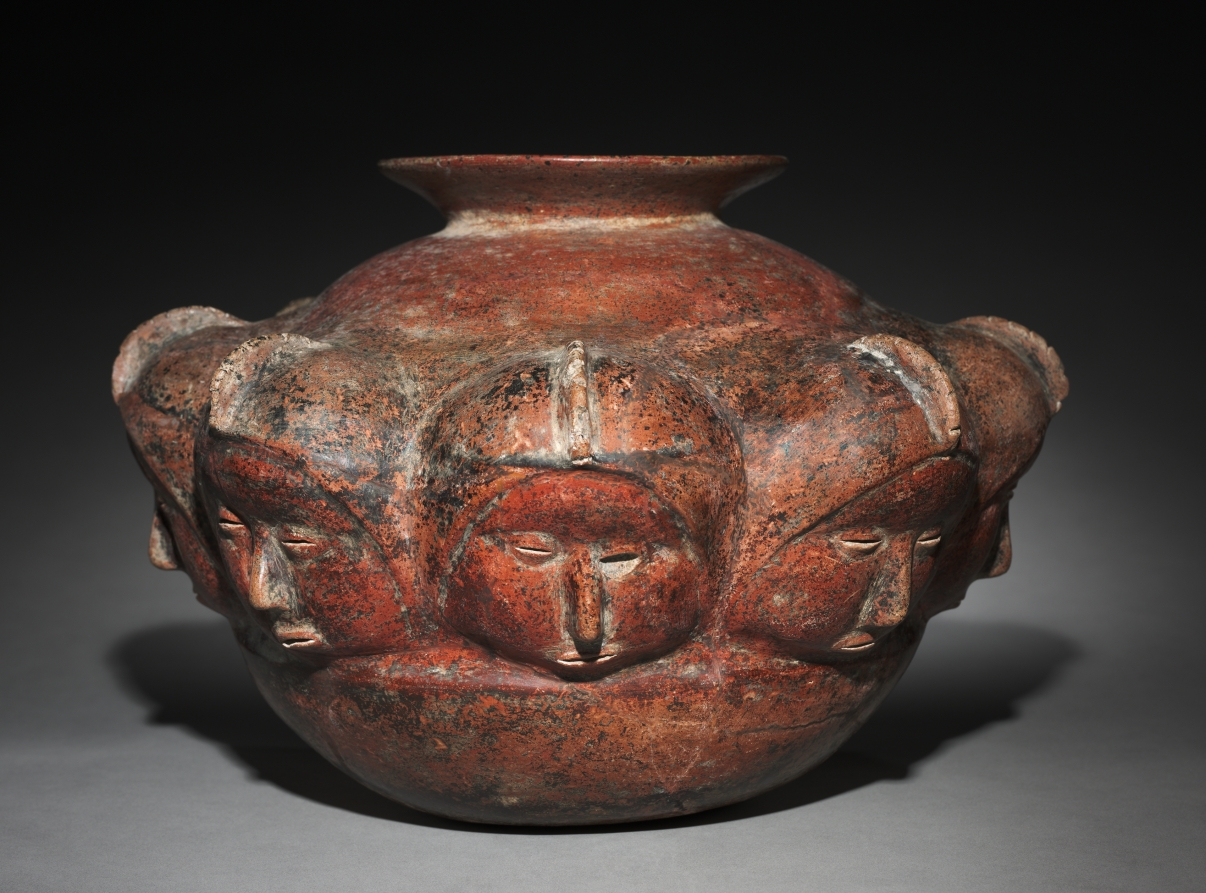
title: Vessel with Crested Heads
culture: West Mexico, Colima, Comala style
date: 200 BCE–300 CE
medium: earthenware with colored slip, black burial deposits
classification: Sculpture